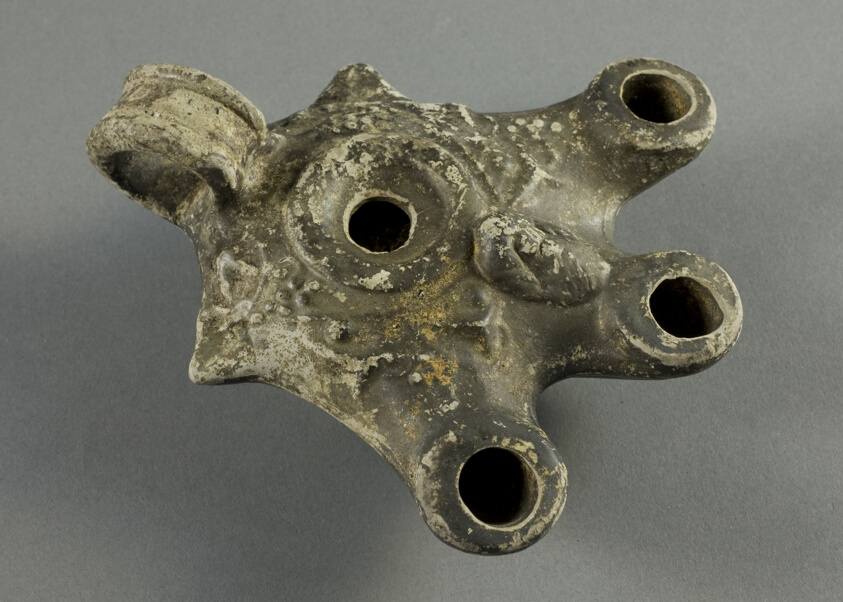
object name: Vessel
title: Lamp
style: roman (ancient, style or period), ancient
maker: Roman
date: 2nd-3rd century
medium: terracotta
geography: Italy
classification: ceramics; vessel; ancient art